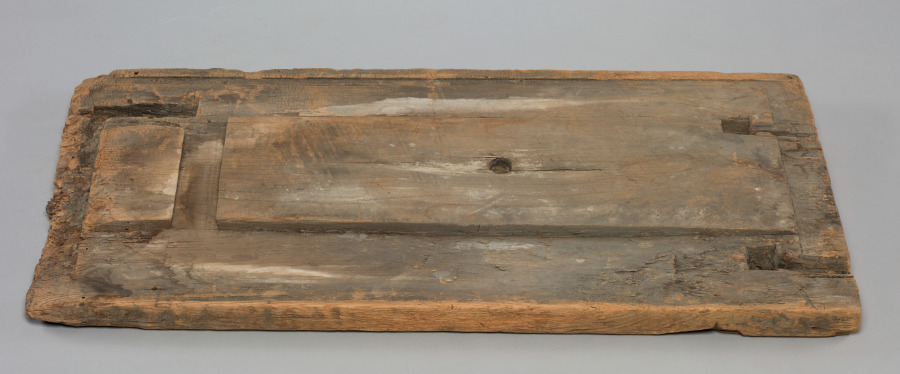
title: Chest on Wheels (Kurumadansu)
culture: Japan, Edo period (1615–1868)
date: 1715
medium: wood with iron fittings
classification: Furniture and woodwork